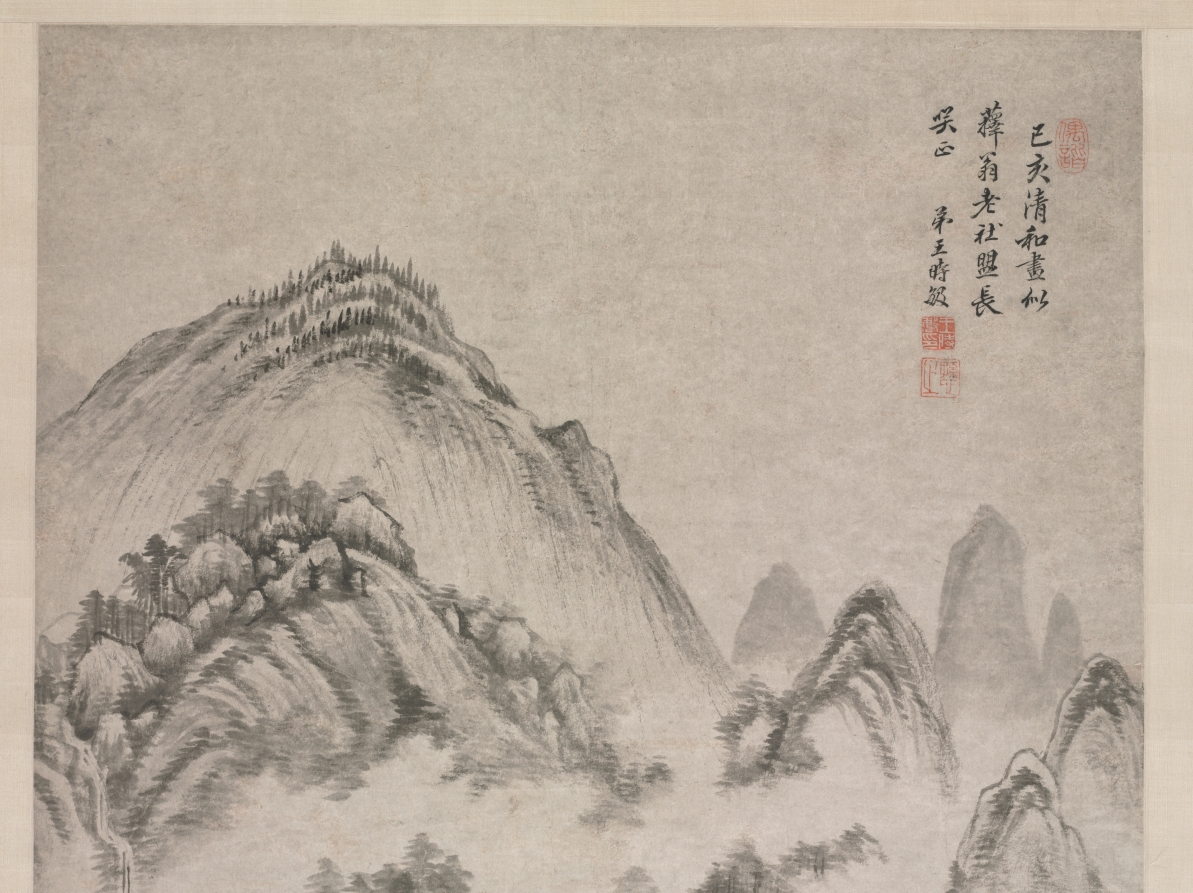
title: Mountain Village Embraced by the Summer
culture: China, Qing dynasty (1644-1911)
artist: Wang Shimin (Chinese, 1592–1680)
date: 1659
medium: hanging scroll, ink on paper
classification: Painting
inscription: Artist's inscription, signature, and 3 seals: [seal] Ouxie 偶諧. In the jihai year [1659], the fourth lunar month, I painted this for T'o-weng, my senior in our literary club, for your amusement and correction. Your junior Wang Shimin. [seals] Wang Shimin yin 王時敏印; Xunzhi 遜之.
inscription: 2 additional seals: 1 of Jiang Gusun [Chiang Ku-sun] 將穀孫 (20th century); 1 of C. C. Wang 王季遷 (1907–2003).